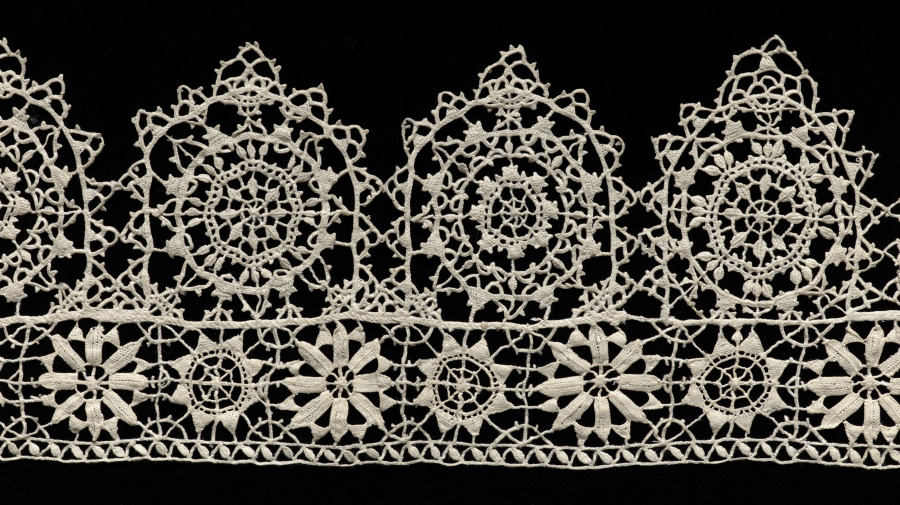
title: Lace Fragment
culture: Italy, Genoa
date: 1550–99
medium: Needle lace (reticella) insertion and edging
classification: Lace